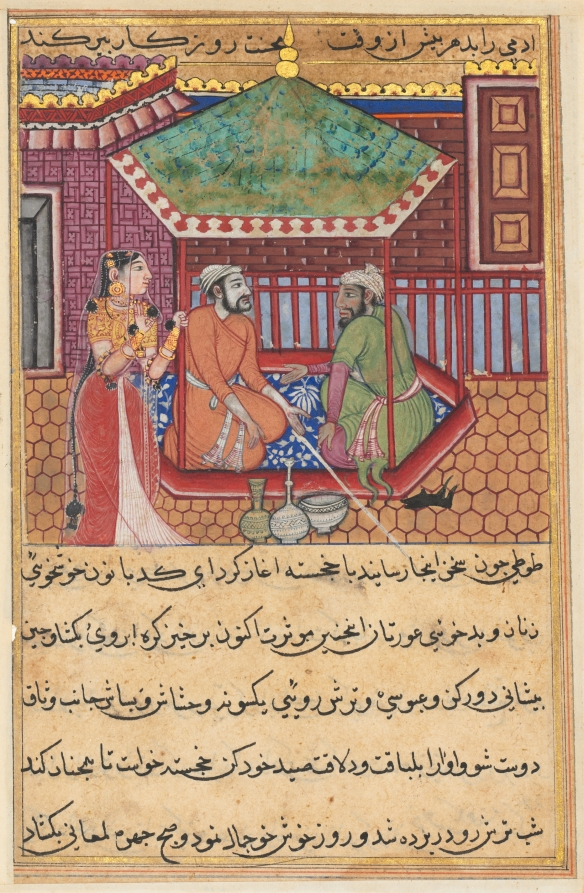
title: The eldest brother explains the reason for his youthful appearance, from a Tuti-nama (Tales of a Parrot): Forty-ninth Night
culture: Mughal India, court of Akbar (reigned 1556–1605)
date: c. 1560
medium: gum tempera, ink, and gold on paper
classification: Painting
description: A king’s official sits conversing with the oldest of three brothers. Despite his advanced age, the man appears younger than all of his siblings. When asked, he explains that he has not aged because his life is free of anxiety: his farm yields abundant crops, and his wife is obedient and happy.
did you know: Strings of pearls are braided into the woman’s hair.